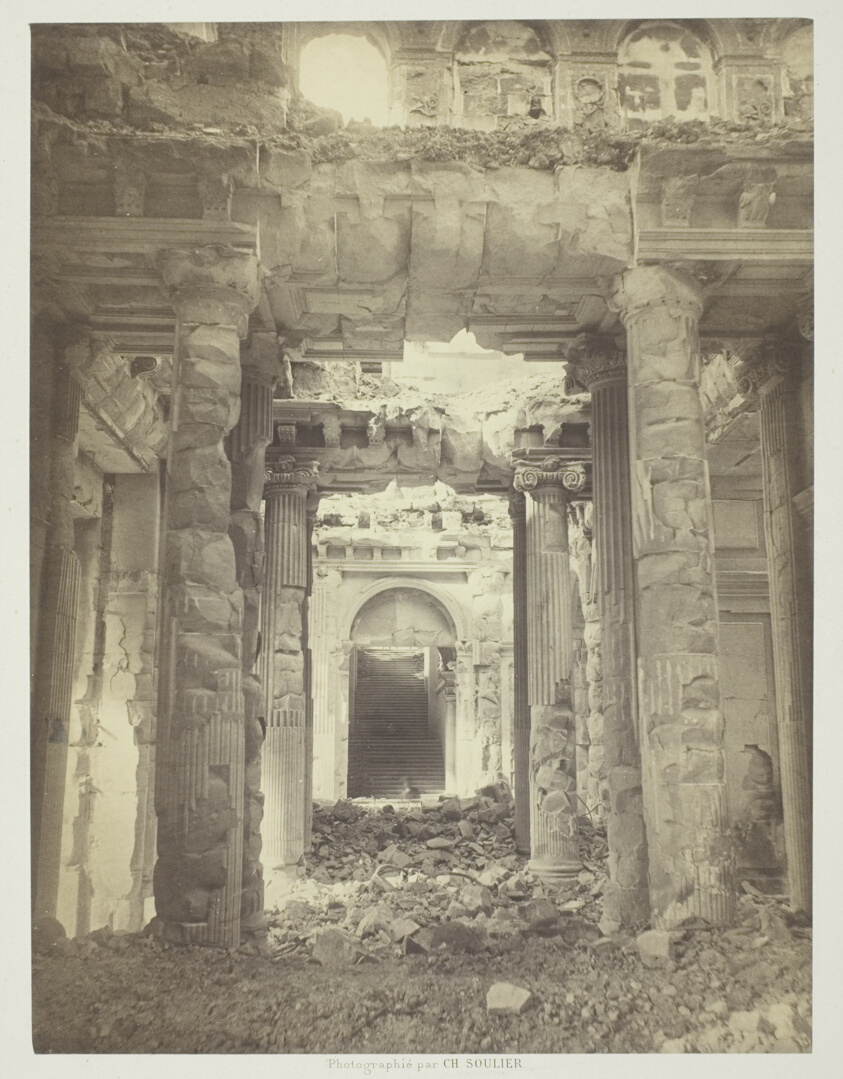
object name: Photograph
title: Paris Fire (The Grand Staircase Entrance), from the series "Paris Incendié"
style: 19th century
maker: Charles Soulier (French, 1840–1875)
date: May 1871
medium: Albumen print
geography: France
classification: albumen silver print; photographic process; photography; photograph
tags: Collected by Hugh Edwards, Paris